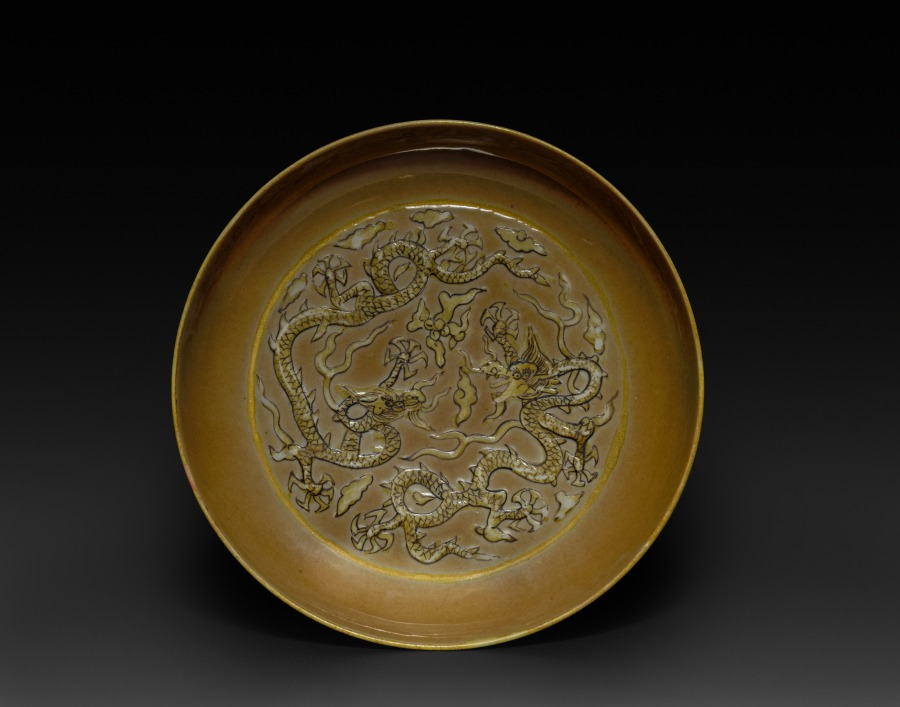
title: Dish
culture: China, Jiangxi Province, Jingdezhen kilns, Ming dynasty (1368–1644), Jiajing mark and reign (1522–66)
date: 1522–66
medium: porcelain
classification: Ceramic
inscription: 大明嘉靖年製